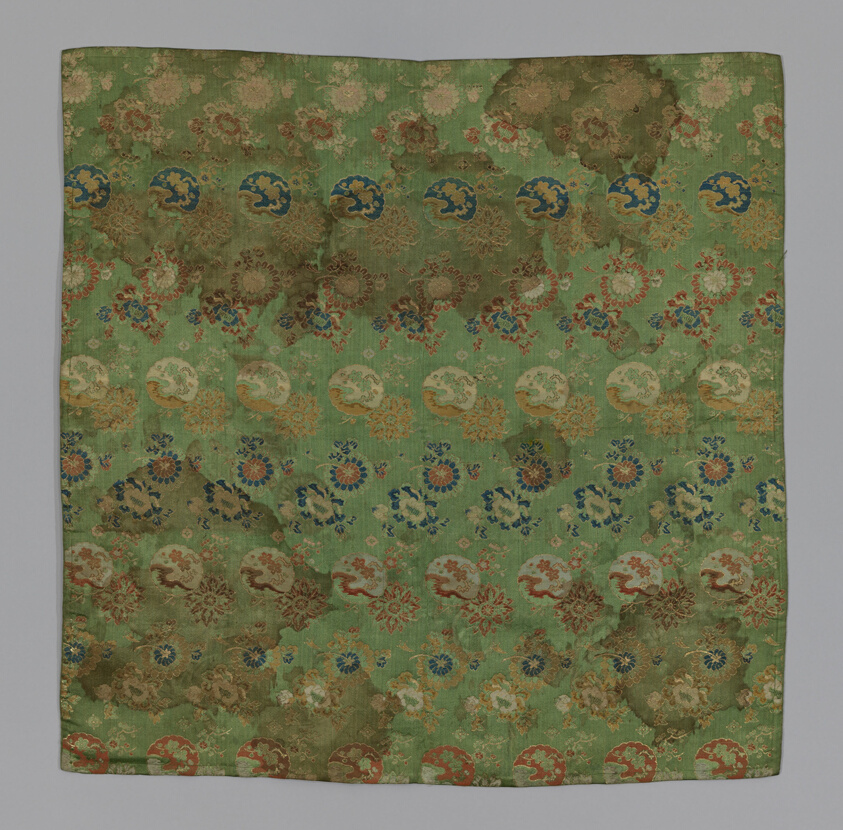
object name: Religious/Ritual Object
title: Uchishiki (Altar Cloth)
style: Japanism, asian, edo (japanese period)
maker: Japan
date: Edo period (1615–1868), 1801/25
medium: Fancy compound satin, silk and gilt paper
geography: Japan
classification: textile; weaving; ritual objects